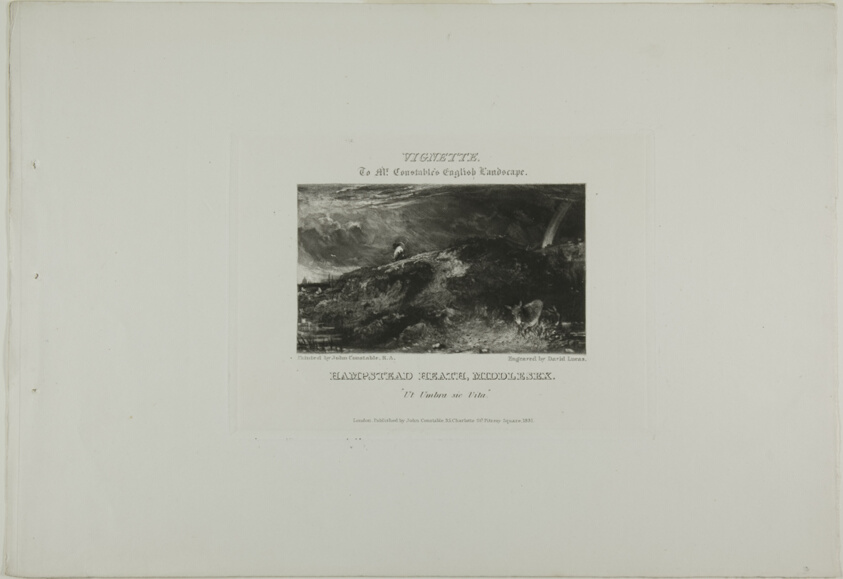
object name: Print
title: Vignette to Mr. Constable's English Landscape. Hampstead Heath Middlesex. Ut Umbra sic Vita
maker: David Lucas (English, 1802-1881); after John Constable (English, 1776-1837)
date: 1831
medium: Mezzotint in black ink on heavy ivory wove paper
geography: England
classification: mezzotint; print; prints and drawing